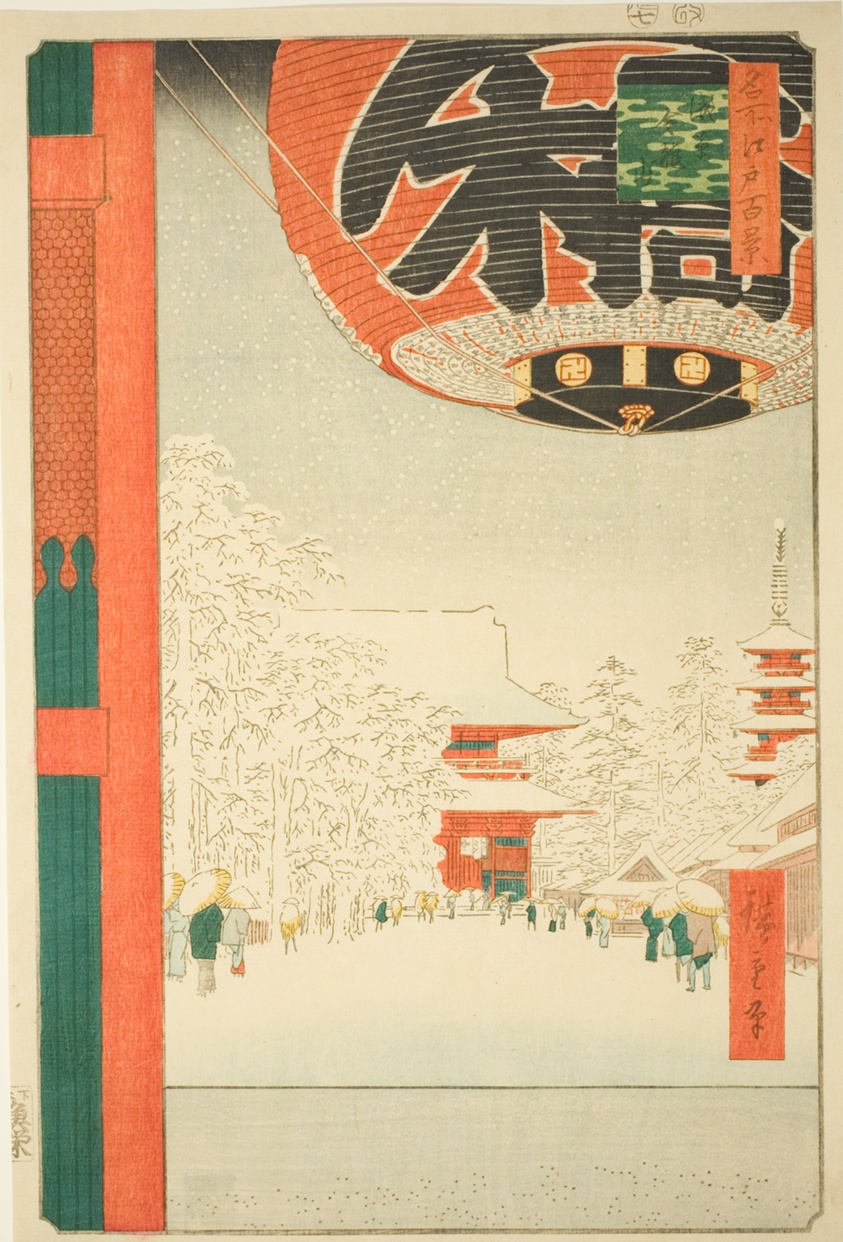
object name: Print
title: Kinryuzan Temple at Asakusa (Asakusa Kinryuzan), from the series "One Hundred Famous Views of Edo (Meisho Edo hyakkei)"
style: Japanese (culture or style)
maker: Utagawa Hiroshige 歌川 広重; Japanese, 1797-1858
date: 1856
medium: Color woodblock print; oban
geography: Japan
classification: print; asian art